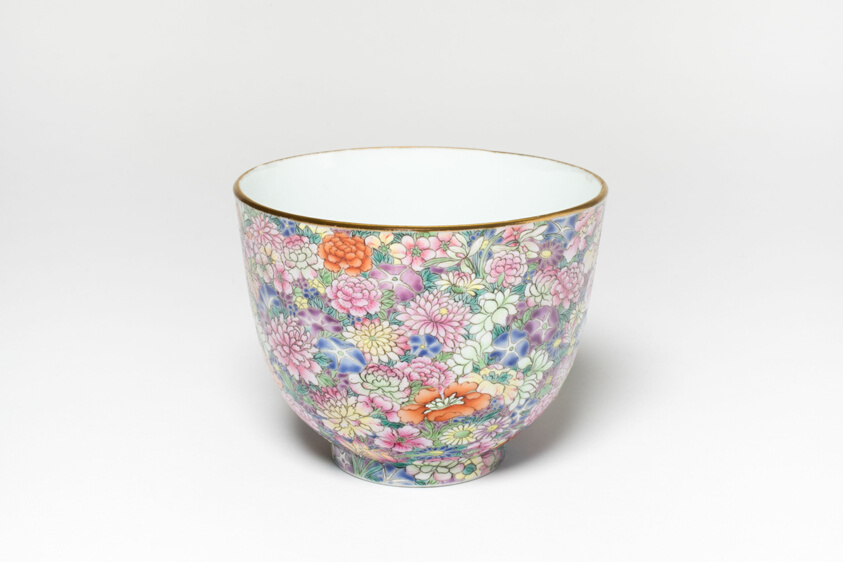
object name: Vessel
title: Cup with Thousand Flowers (Millefleurs) Design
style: Chinese (culture or style)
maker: China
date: Qing dynasty (1644–1911), Jiaqing reign mark and period (1796–1821)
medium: Porcelain with overglaze enamel decoration and metal rim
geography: China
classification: drinking vessel; porcelain; ceramics; asian art; vessel